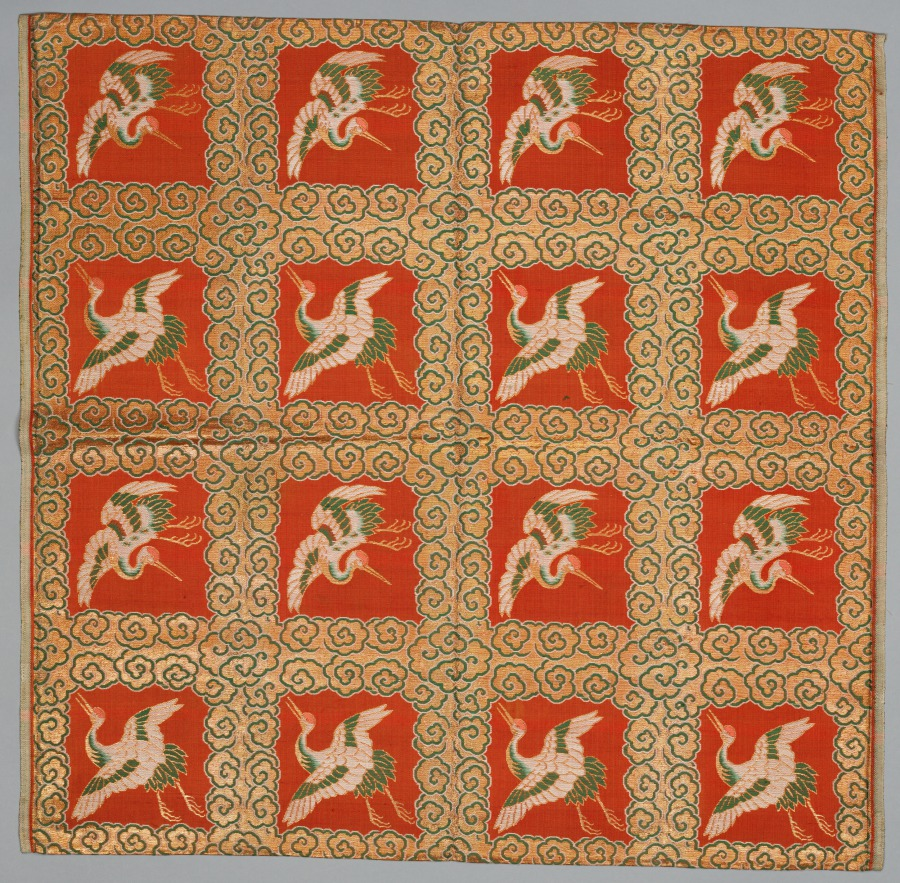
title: Brocaded Fukusa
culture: Japan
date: late 1800s-early 1900s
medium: silk, metallic thread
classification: Textile